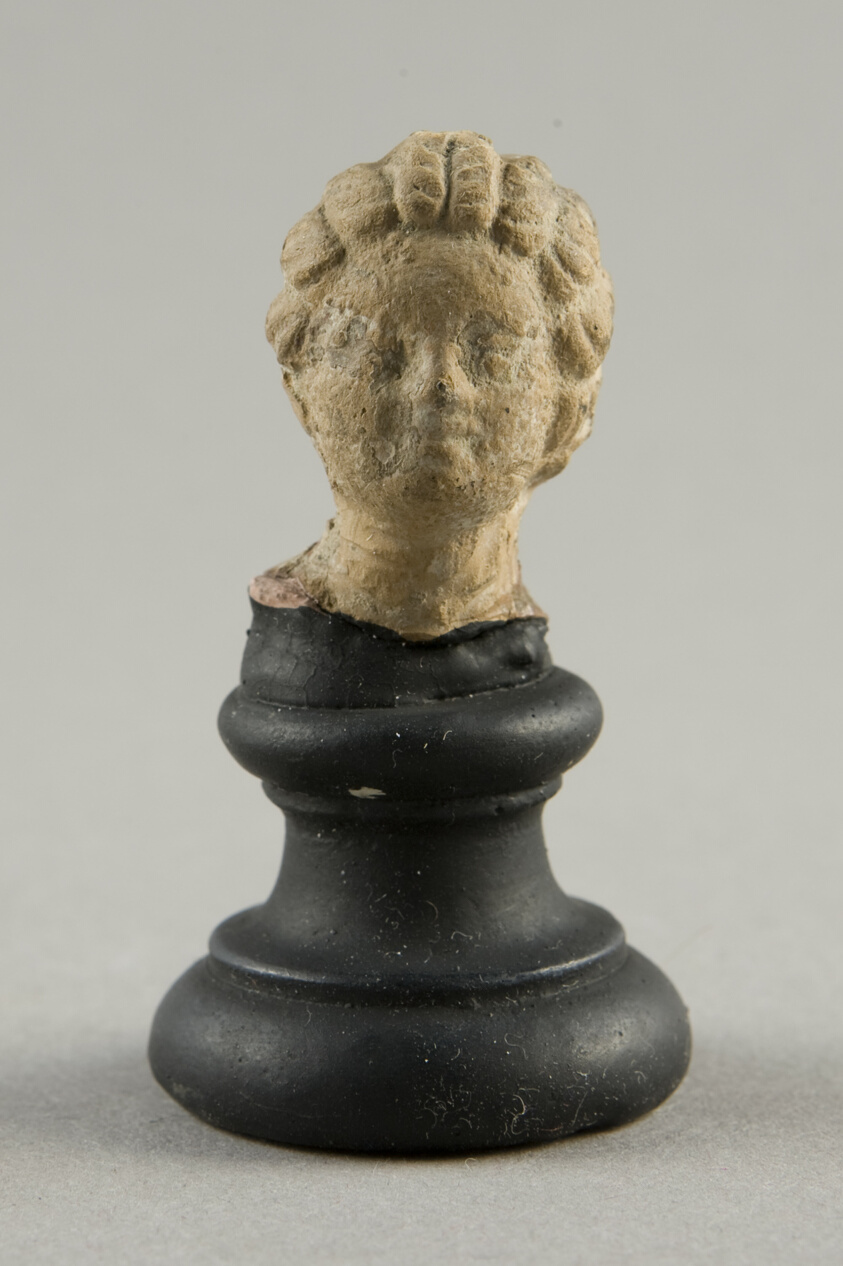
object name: Sculpture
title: Head of a Child (?)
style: greek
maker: Greek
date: 3rd-1st century BCE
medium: terracotta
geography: Greece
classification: earthenware; ceramics; sculpture; ancient art